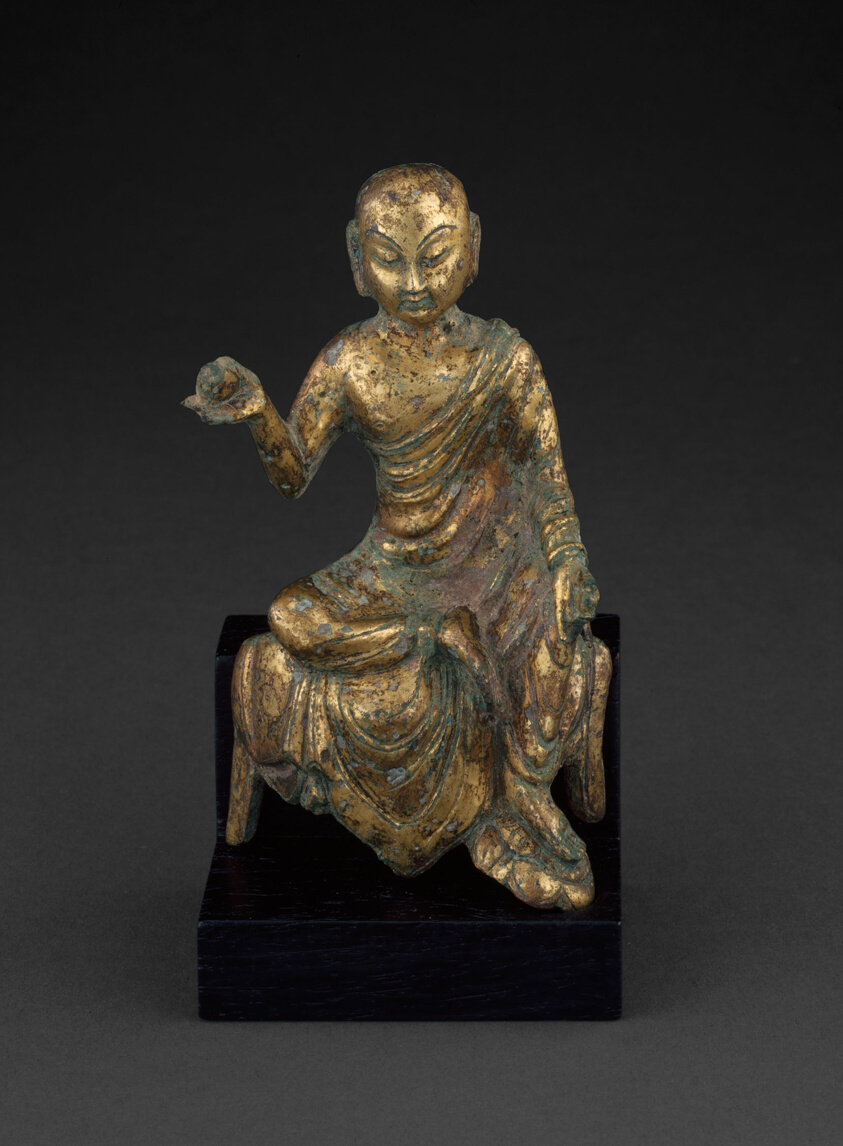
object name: Sculpture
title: Dicang (Khsitigarbha), or "He Who Encompasses the Earth," Seated and Holding a Wish-Bearing Jewel (Cintamani)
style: Chinese (culture or style)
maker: China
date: Tang dynasty (618–907), c. 8th century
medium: GIlt copper alloy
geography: China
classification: bronze; metal; sculpture; asian art